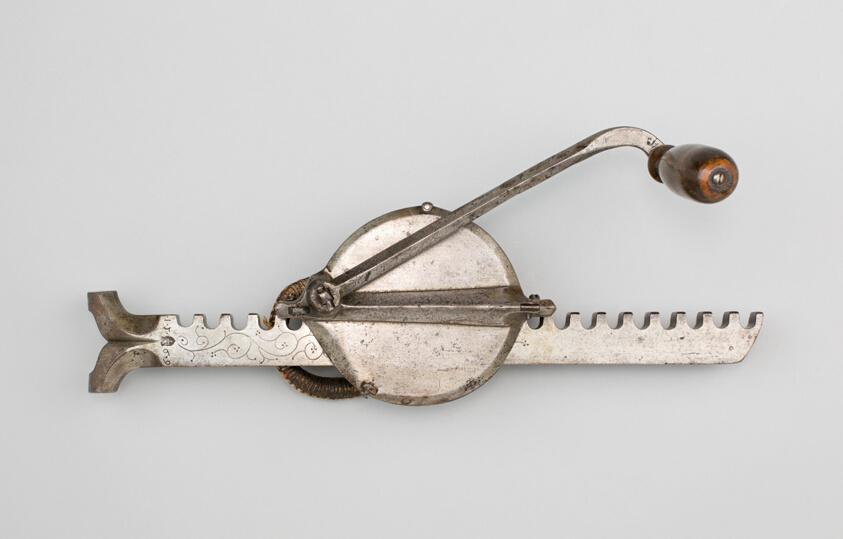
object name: Arms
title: Cranequin (Winder) for a Crossbow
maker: German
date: 1569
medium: Steel, wood, and cord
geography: Germany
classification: crossbow; arms; arms and armor